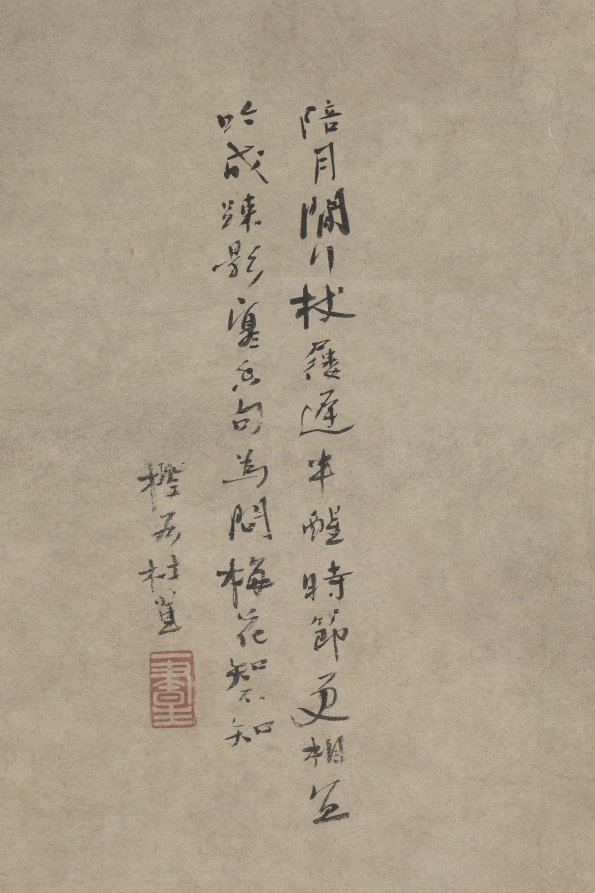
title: The Poet Lin Bu Wandering in the Moonlight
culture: China, Ming dynasty (1368–1644)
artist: Du Jin (Chinese, 1446-c. 1519)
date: late 1400s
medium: Hanging scroll; ink and color on paper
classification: Painting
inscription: 陪月閒行杖屨遲，半醒時節更相宜。 吟成疏影寒香句，為問梅花知不知。 檉居杜堇 [印]一書生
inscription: 1 seal of Zhang Heng 張珩 (1915–1963)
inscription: 1 seal of C. C. Wang [Wang Jiqian] 王季遷 (1907–2003)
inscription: 1 unidentified seal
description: Lin Bu (967–1028), a Northern Song (960–1127) poet and hermit who lived at the West Lake in Hangzhou, was known for having plum trees for his female companions and cranes for his children. This hanging scroll depicts the poet walking in the moonlight and looking at the plum tree, a scene described in his most well-known poem on plum blossoms. Surviving works signed by Du Jin are rare and this painting is one of them. Here, the artist used lively brushwork to depict the plum tree and rocks, exemplified in varying dots and strokes, and sweeps in different shades of ink.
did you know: Lin Bu withdrew from prestigious government service and lived as a hermit by the West Lake in Hangzhou.